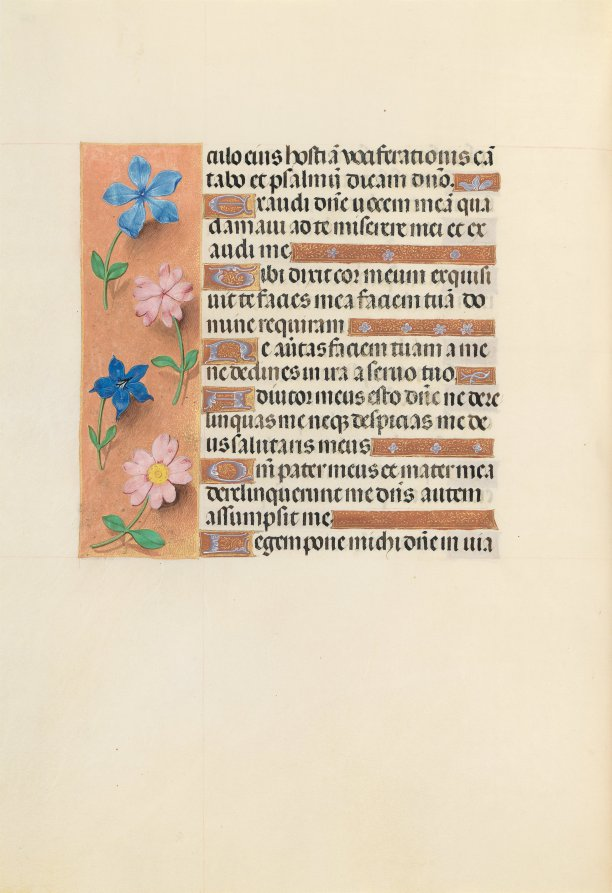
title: Hours of Queen Isabella the Catholic, Queen of Spain: Fol. 236v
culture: Flanders, Ghent and Bruges, late 15th century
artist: Master of the First Prayerbook of Maximillian (Flemish, c. 1444–1519)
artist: and Associates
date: c. 1500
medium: ink, tempera, and gold on vellum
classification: Bound Volume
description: This manuscript was illuminated by a circle of at least five highly organized manuscript painters active in the Flemish cities of Ghent and Bruges. The principal illuminator was Alexander Bening, who painted the majority of the book's miniatures. Manuscripts produced by this circle of artists are renowned for the decoration of their borders, which typically feature a rich variety of realistically-painted flowers, birds, and butterflies. This prayer book, called a book of hours, was intended not for a cleric, but for the private devotions of a lay person-in this case, Isabella the Catholic, Queen of Spain (1451-1504). Isabella's coat of arms embellishes the book's frontispiece. It is unlikely that the book was commissioned by the Queen herself; rather, she probably received it as a diplomatic gift from someone courting her patronage, perhaps Cardinal Francisco Jimenez de Cisneros. A Franciscan friar, Jimenez was dependent upon Isabella for his advancement, first to the post of Queen's confessor in 1492, and then to Archbishop of Toledo in 1495.